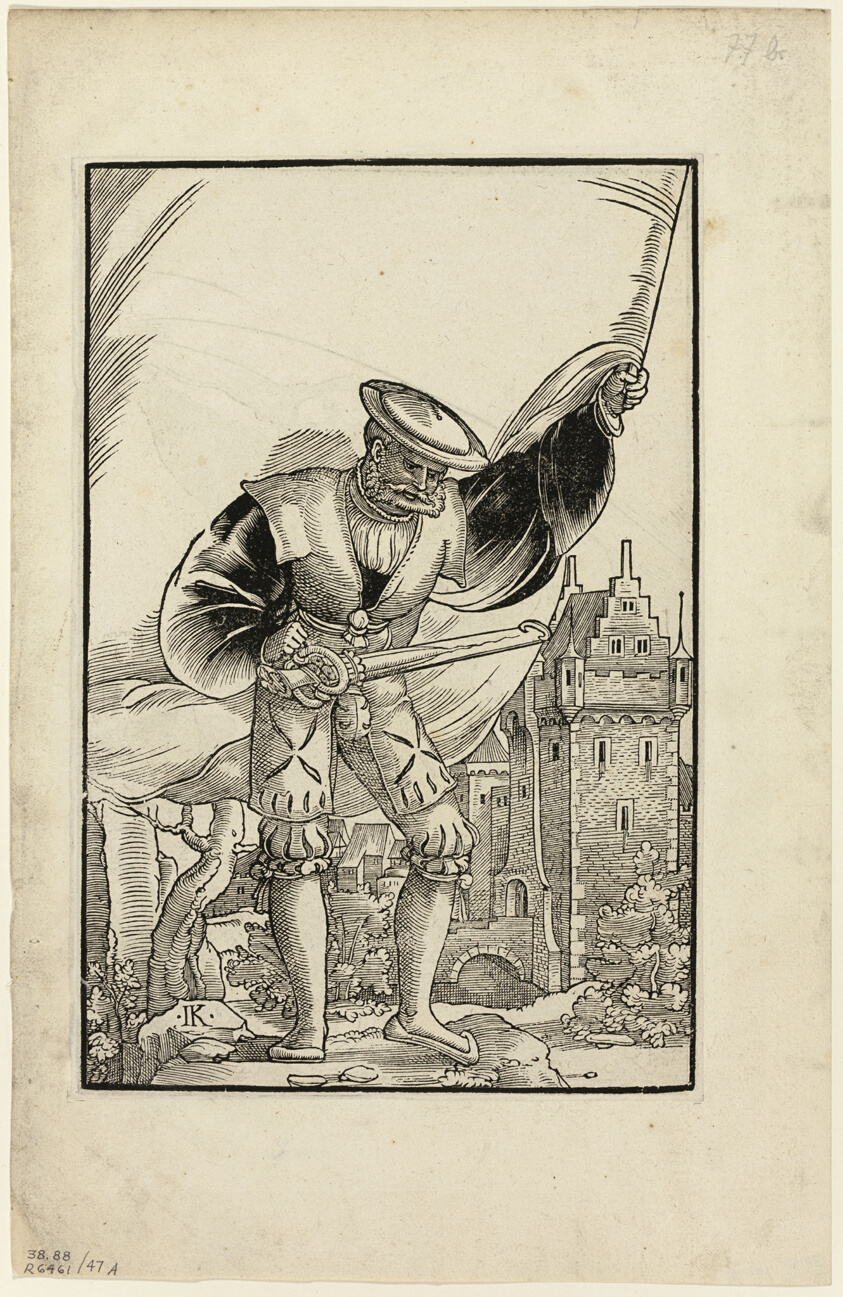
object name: Print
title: German Soldier Standing with Flag (recto) and German Soldier Marching with Flag (verso) from Wappen des heiligen römischen Reichs Teutscher Nation, plate 47 from Woodcuts from Books of the XVI Century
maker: Attributed to Monogrammist I.K. (German, active 1536-1545); assembled by Max Geisberg (Swiss, 1875-1943)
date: 1545, assembled into portfolio 1937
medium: Woodcut in black on cream laid paper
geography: Germany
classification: woodcut; print; prints and drawing